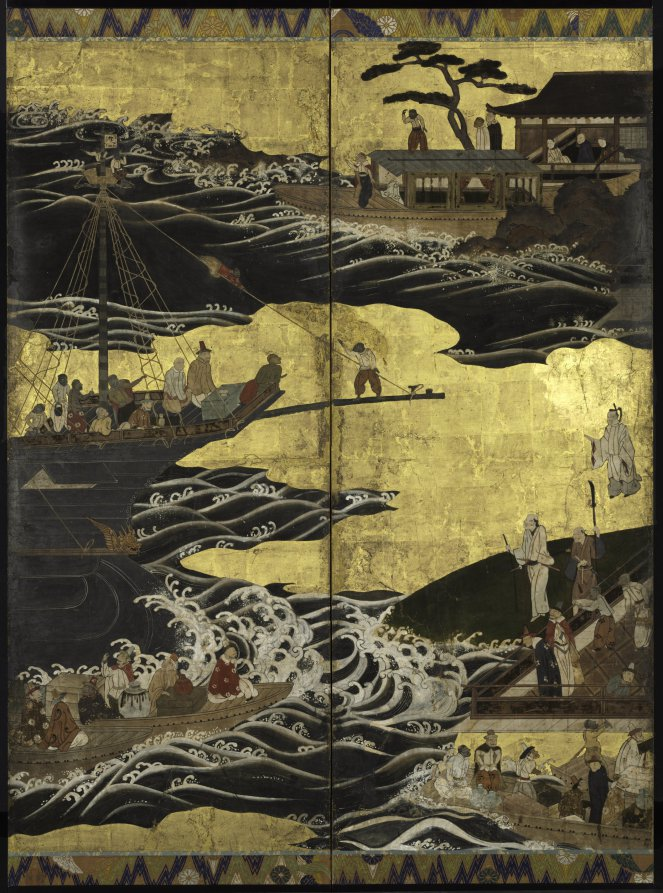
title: Arrival of the "Southern Barbarians"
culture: Japan, Momoyama period (1573–1615)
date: c. 1600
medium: One of a pair of six-panel folding screens; ink, color, and gold on paper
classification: Painting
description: This screen and its corresponding screen show Portuguese merchants arriving in Japan, having crossed the oceans in their large ship with a multinational crew. The Portuguese were known in Japan as the “Southern Barbarians” because they arrived from the south and their customs and manners were unfamiliar to the Japanese, who had not encountered anyone from Europe until their first appearance in 1543. In 1639, the Portuguese were forced out of Japan, mainly owing to internal difficulties caused by their Catholic missionaries, but they were a major conduit for both objects and ideas from Europe for nearly 100 years.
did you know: Europeans were called "Southern Barbarians" because their ships arrived in Japan from the south.